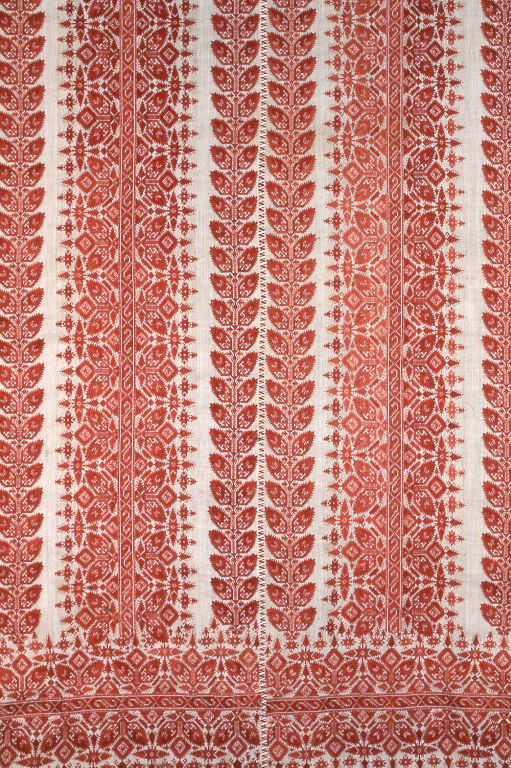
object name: Textile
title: Bed Curtain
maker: Greece, Cyclades or Dodecanese Islands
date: 1675/1725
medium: Linen, plain weave; embroidered with silk in running (pattern darning) stitches; edge finished with buttonhole and four-sided stitches; needle-made inserts of oblique interlacing; four loom widths joined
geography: Greece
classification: textile; needlework (visual works)